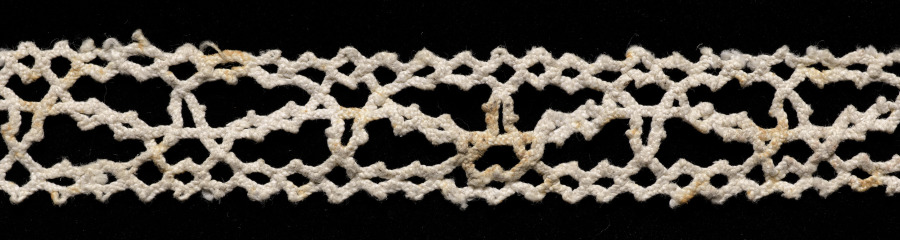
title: Lace Insertion (no selvage)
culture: Italy, Venice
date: 1580–99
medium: Bobbin lace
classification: Lace